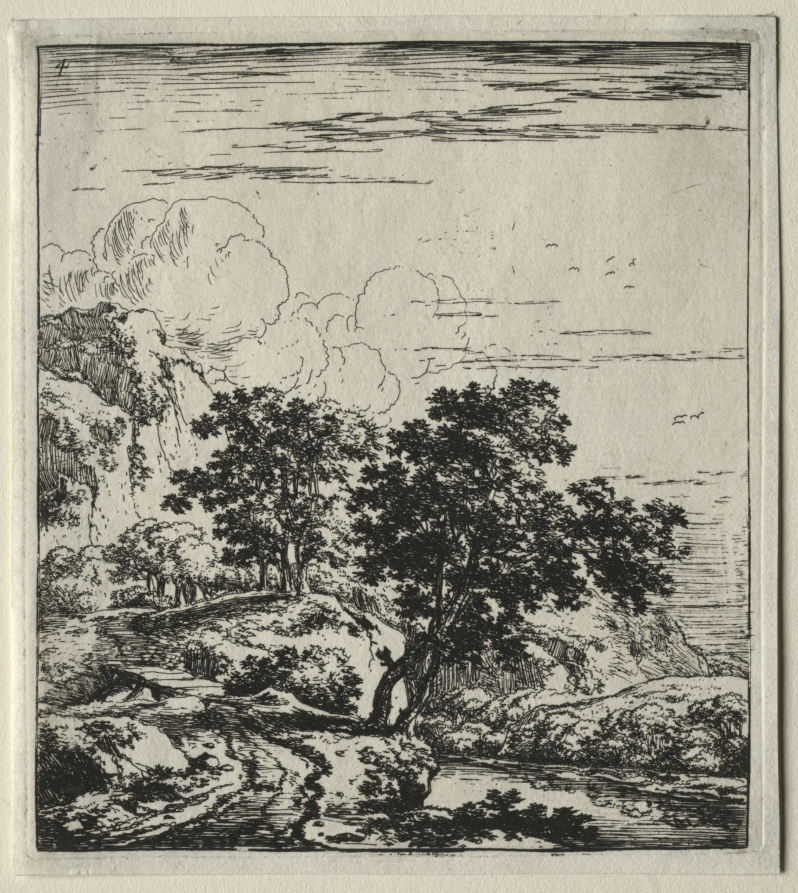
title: Le sentier au bord de la rivière et le petit pont du bois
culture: Flanders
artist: Herman Naiwincx (Flemish, c. 1624–after 1651)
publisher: Clement de Jonghe (Dutch, 1579–1679)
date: 1640–51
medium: engraving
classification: Print